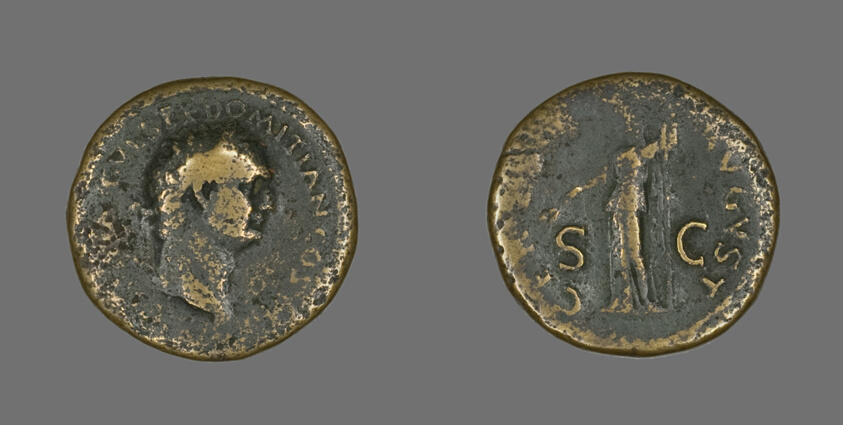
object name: Coin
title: Coin Portraying Emperor Domitian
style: imperial (roman), ancient, roman (ancient, style or period)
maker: Roman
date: 81-96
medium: Bronze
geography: Roman Empire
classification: coin; ancient art